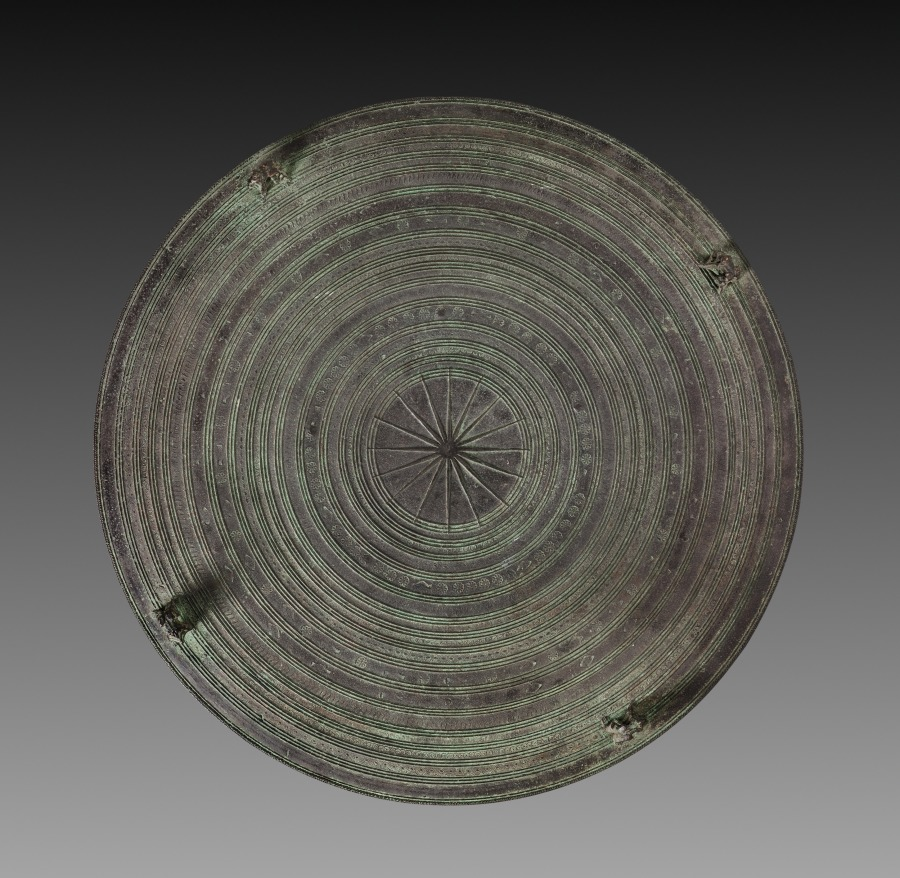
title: Dongson Drum Top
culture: Southeast Asia, Thailand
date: 300–400 CE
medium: bronze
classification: Metalwork